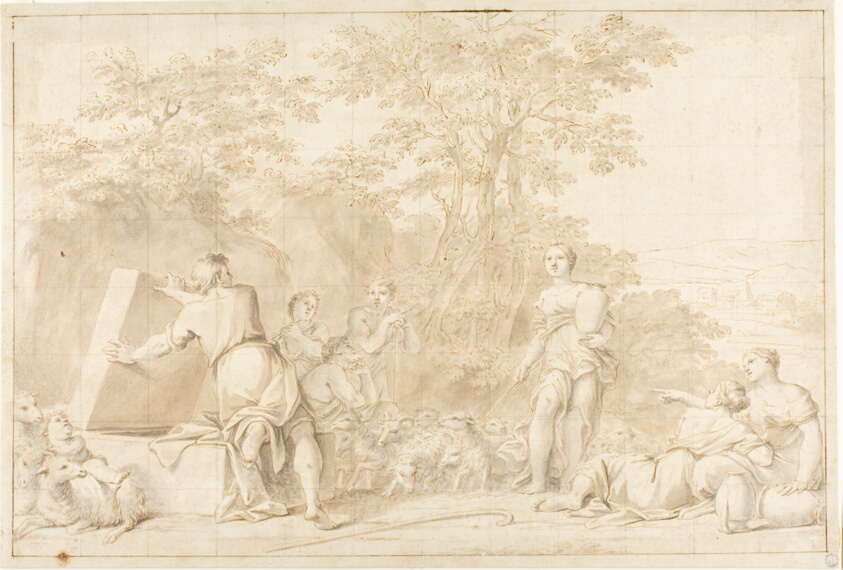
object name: Drawing and Watercolor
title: Jacob and Rachel at the Well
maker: After Marcantonio Franceschini; Italian, 1648-1729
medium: Pen and brown ink, with brush and brown wash, with charcoal, squared in graphite, on ivory laid paper, laid down on ivory laid paper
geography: Italy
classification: pen and ink drawings; drawings (visual works); prints and drawing